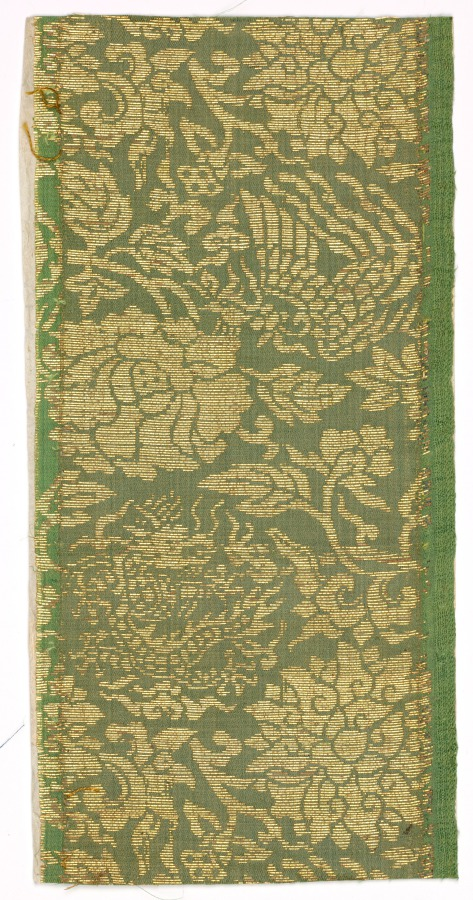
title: Textile Fragment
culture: Japan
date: 1800s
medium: silk, metallic thread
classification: Textile